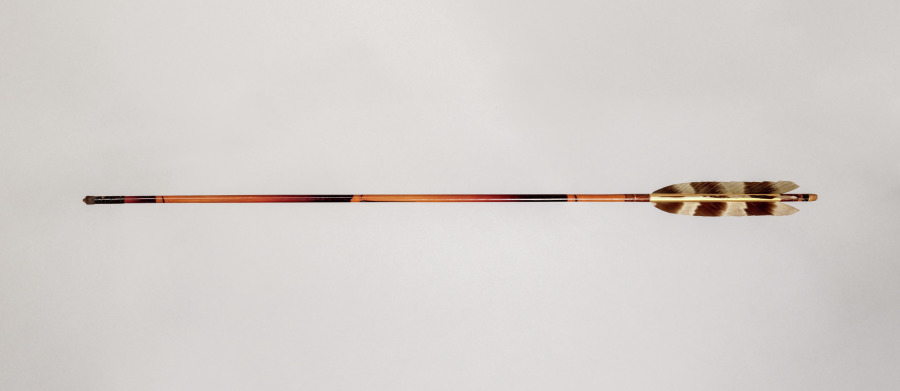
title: Arrow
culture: Japan, Edo period (1615–1868) to Meiji period (1868–1912)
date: 1800s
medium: bamboo shaft tipped with metal point and heeled with feathers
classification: Arms and Armor